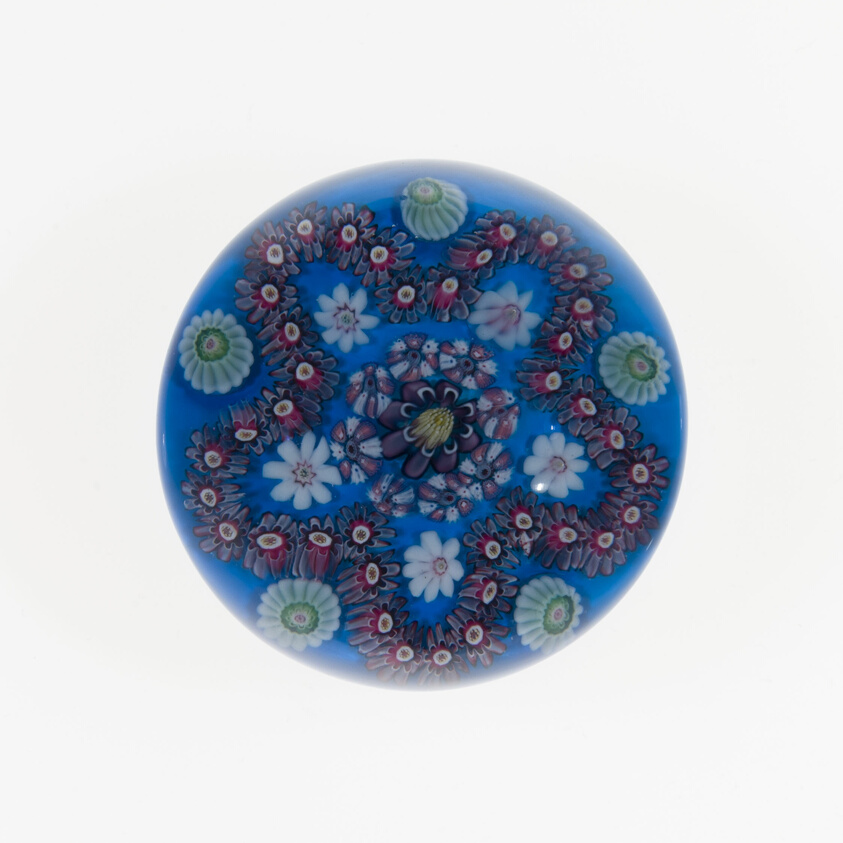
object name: Glass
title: Paperweight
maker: Clichy Glassworks (Cristalleries de Clichy); Clichy, France, 1837-1885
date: c. 1845/60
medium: Glass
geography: France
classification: paperweight; glass